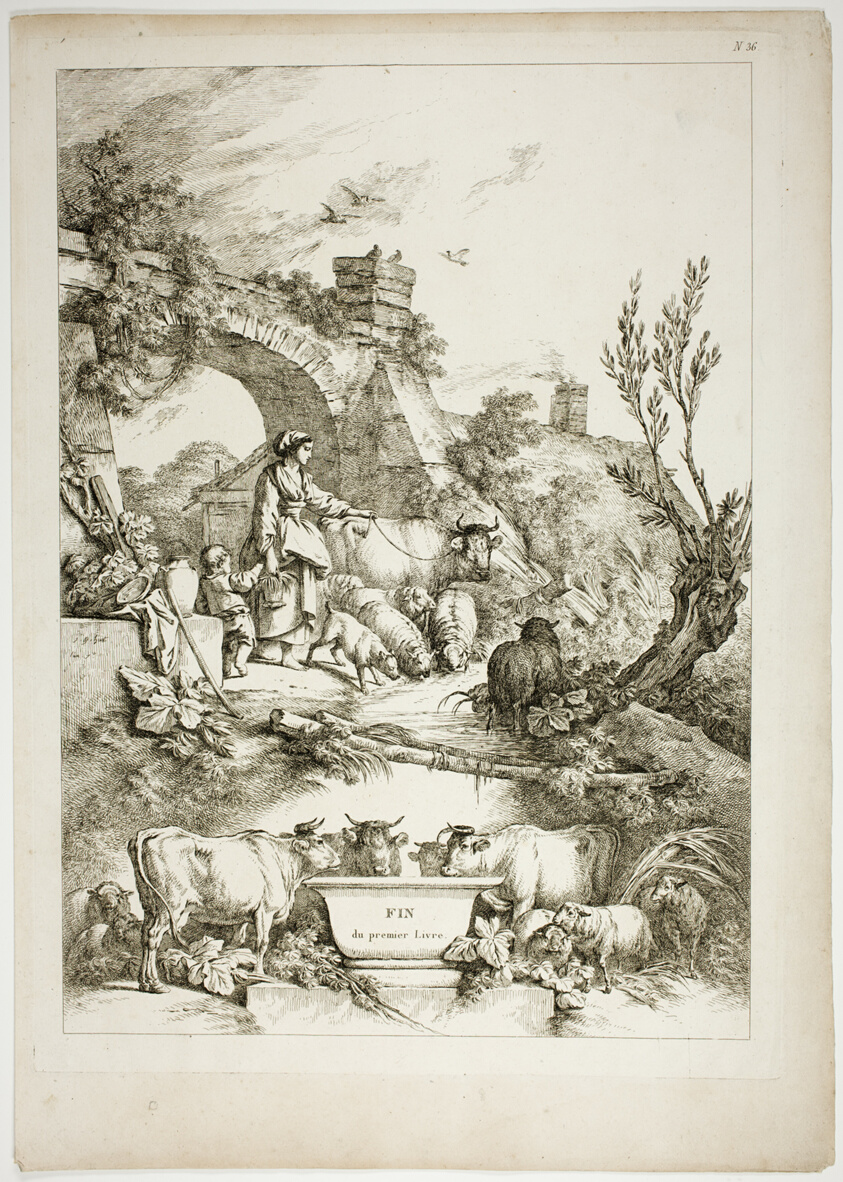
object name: Print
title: Plate 36 of 38 from Oeuvres de J. B. Huet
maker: Jean Baptiste Huet (French, 1745-1811)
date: 1796–99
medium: Etching on paper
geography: France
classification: etching; print; prints and drawing